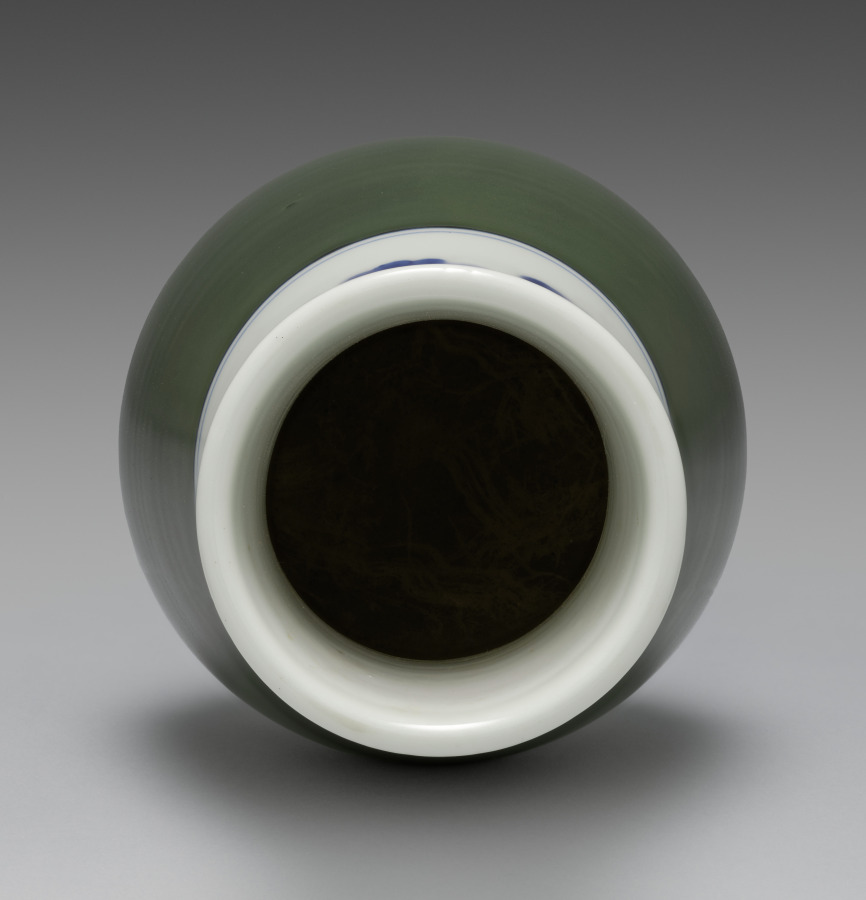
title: Flower Vase with Floral Scroll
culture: Japan, Meiji period (1868–1912)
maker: Seifū Yohei III (Japanese, 1851–1914)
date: 1893–1914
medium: Porcelain with underglaze colors and green glaze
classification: Ceramic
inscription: 清風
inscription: 帝室技芸員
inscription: 金聲玉振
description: The upper part of this vase is painted in underglaze blue with a floral scroll of leaves accentuated with a single chrysanthemum motif on each face and bound at top and bottom with single blue lines. The box lid for the vase is short on detail; the inscription notes only that it is a flower vase with underglaze blue. It is possible that the box is a mismatch because the inscription does not mention the vase’s more distinctive feature: the deep green glaze on its lower half, which is seen much less frequently among Yohei III’s works. This glaze may be an example of a dark green porcelain glaze called rōkanji, which the artist invented in 1892. The name of the glaze comes from Chinese, in which it is pronounced langgan. It may literally mean “tinkling sound of jade” and could refer to malachite, among other proposed identifications.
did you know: The center of each chrysanthemum has a crescent-shaped design at the top filled with a very pale yellow wash under the transparent glaze.